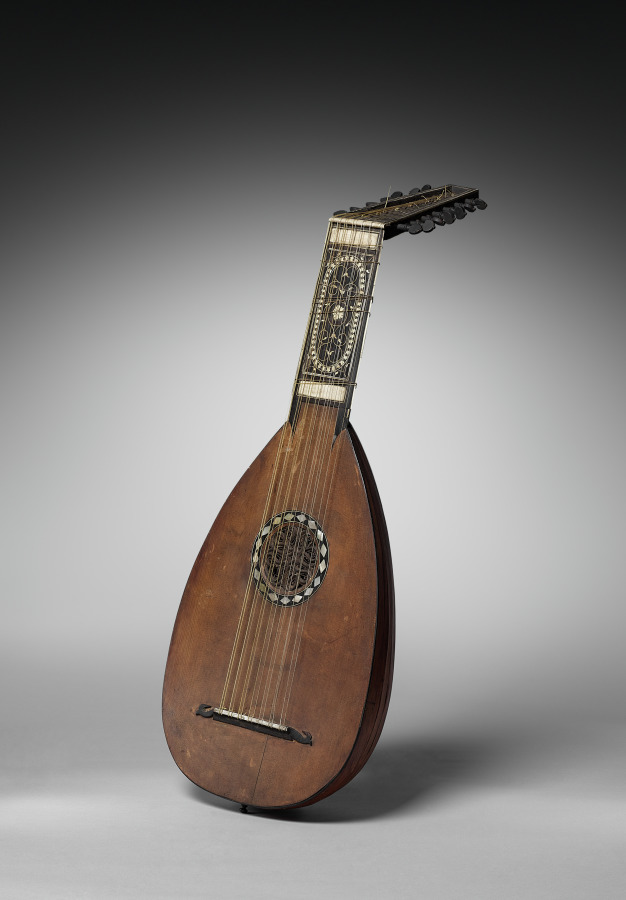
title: Lute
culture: Italy, Venice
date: c. 1550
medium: wood, laminated parchment?, sound hole, bone, ebonized wood, and mother of pearl inlay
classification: Musical Instrument